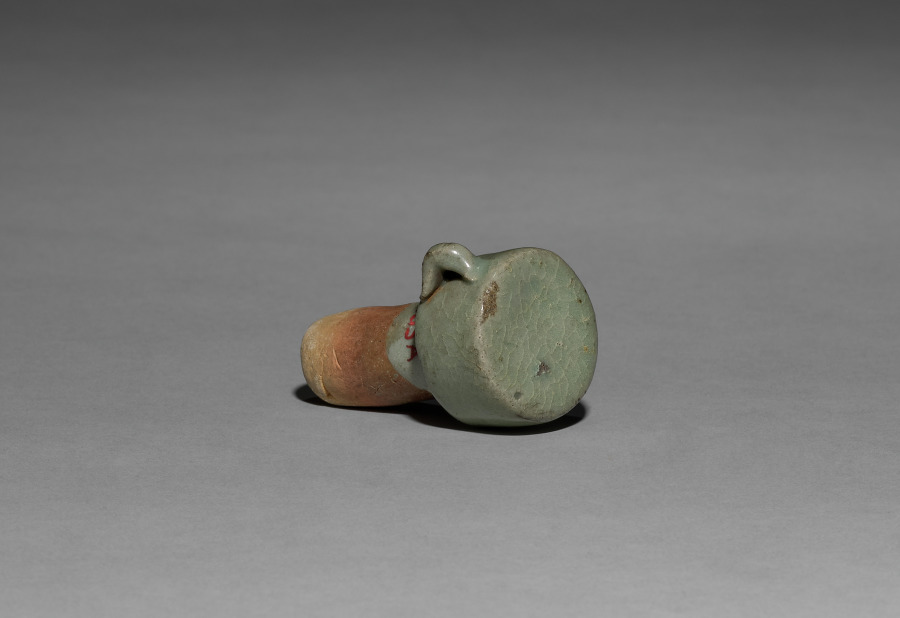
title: Wine Pot (lid)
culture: Korea, Goryeo dynasty (918–1392)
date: 918–1392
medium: pottery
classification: Ceramic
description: As early as the seventh century, the practice of drinking tea and wine became an important part of elite culture in Korea. Elites of the Goryeo period commissioned a variety of types of utensils and vessels including this elegant wine pot, not only to make their drinking experience more exciting, but also to show their appreciation of nature.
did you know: A chain or cord once connected a small loop on the handle and the lid to serve beverages without spilling.